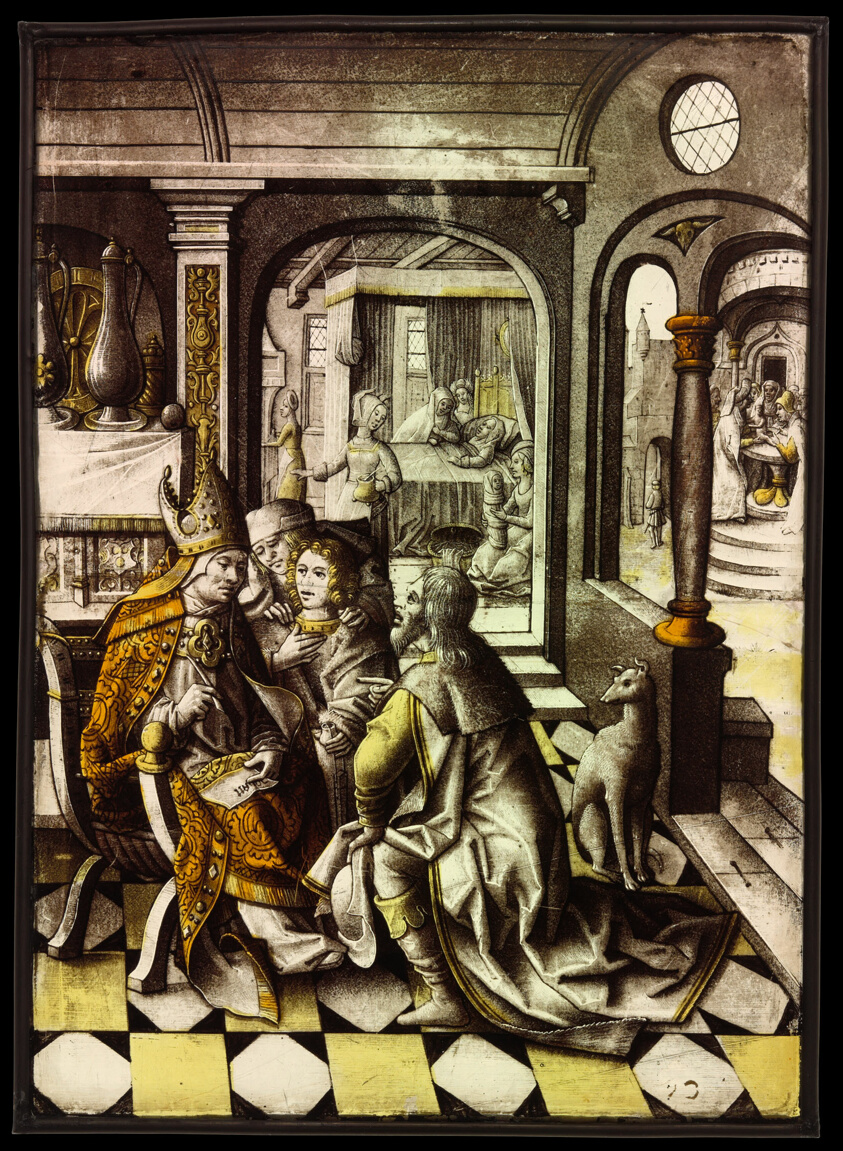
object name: Glass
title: The Birth and Naming of Saint John the Baptist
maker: Northern Netherlandish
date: c. 1525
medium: Glass, vitreous paint, and silver stain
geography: Netherlands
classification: stained glass/leaded glass; glass; european decorative arts; decorative arts